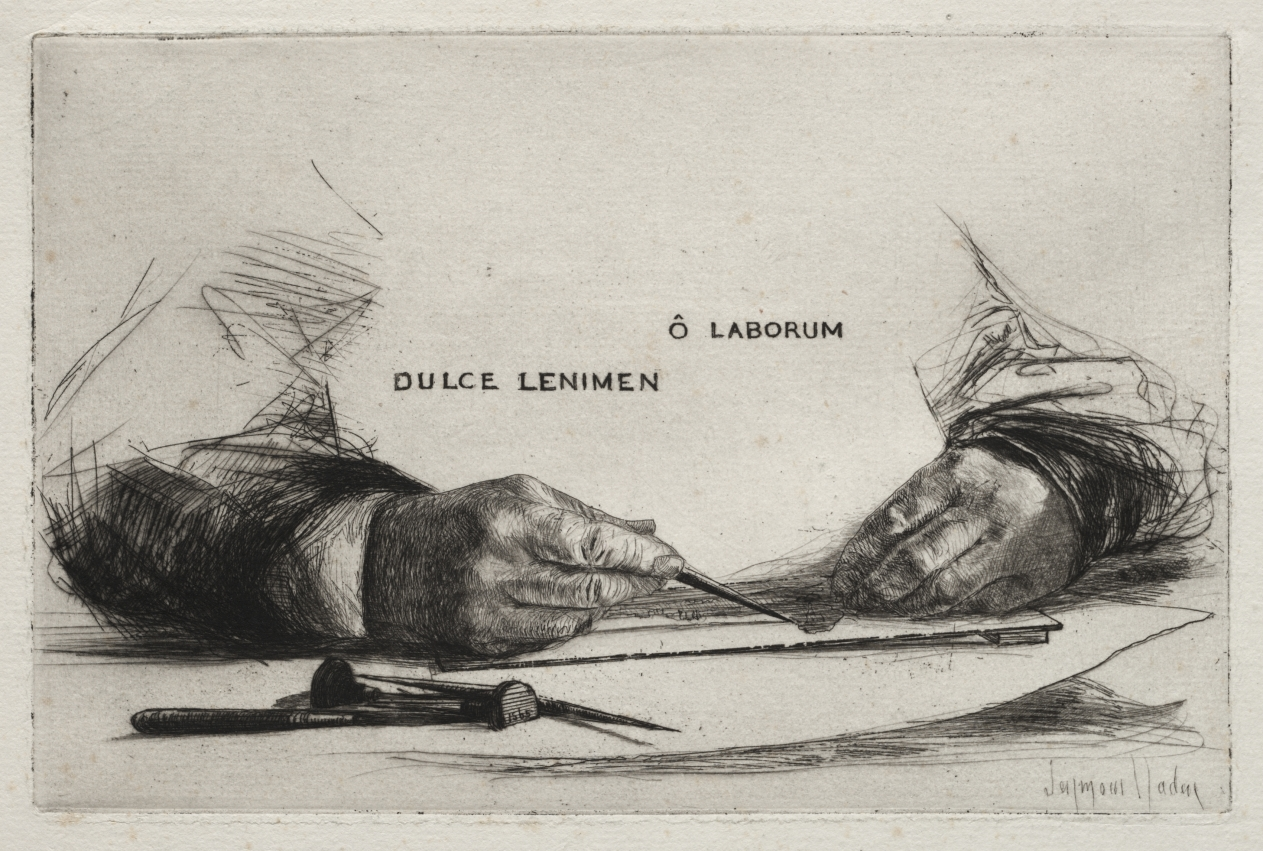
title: Hands Etching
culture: England, 19th century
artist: Francis Seymour Haden (British, 1818–1910)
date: 1865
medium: etching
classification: Print